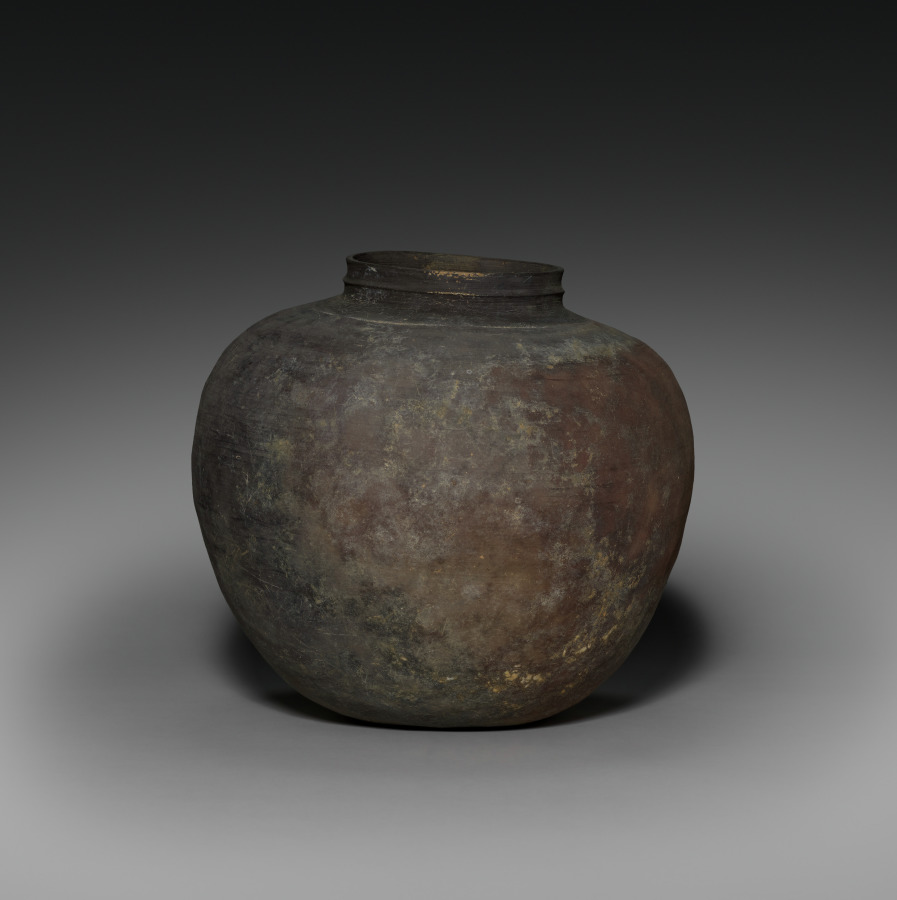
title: Vessel with Knobbed Lid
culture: Korea, Gaya period (42–562 CE)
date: 200s–300s CE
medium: stoneware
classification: Ceramic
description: This storage vessel is distinguished by its robust, subtly proportioned form and its body color. The purplish-brown surface "skin" is enlivened by a series of smoky black swirling marks that occurred during the firing in the wood kiln. This shape began as a series of clay coils that were pinched and then paddled; however, it spent more time on a potter's wheel to thin and finish its outer surface. The lid received similar, understated attention to detailing and finish.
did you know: This type of lidded vessel served to contain cremated remains, indicating the popularity of Buddhist mortuary practice in Korea during the Three Kingdoms period.